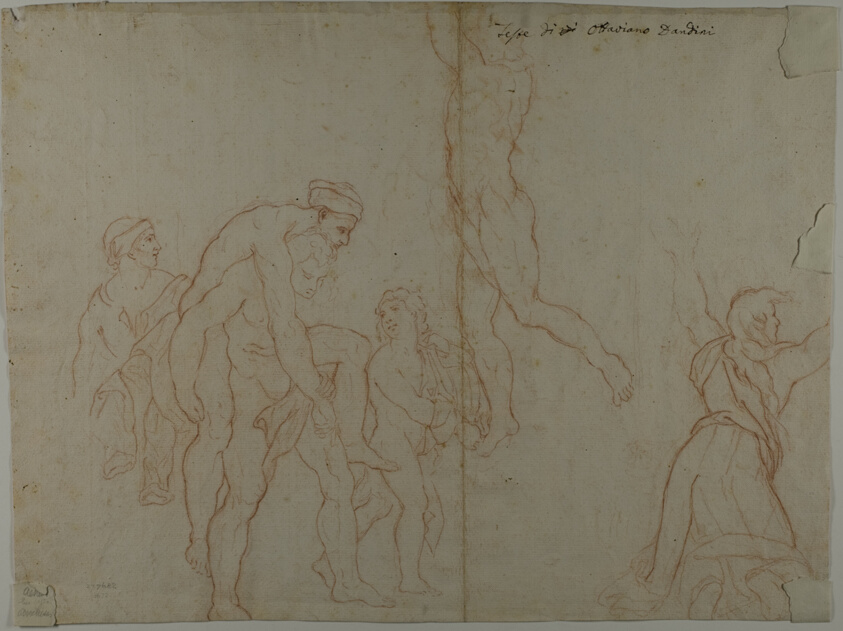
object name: Drawing and Watercolor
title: Fire in the Borgo (recto); Slight Sketch of the Fire in the Borgo (verso)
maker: Ottaviano Dandini (Italian, c. 1706-1750); after Raffaello Sanzio, called Raphael (Italian, 1483-1520)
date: 1726/1750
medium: Red chalk (recto and verso) on ivory laid paper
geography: Italy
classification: chalk; drawings (visual works); prints and drawing